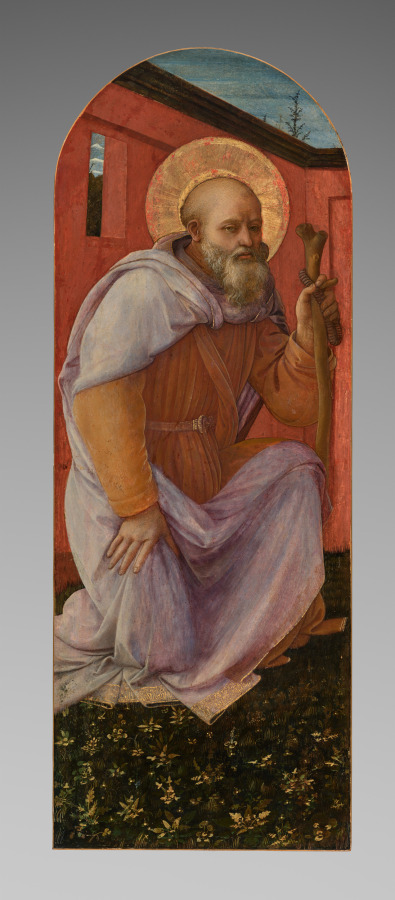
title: Panel from a Triptych: St. Anthony Abbot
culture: Italy, 15th century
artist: Fra Filippo Lippi (Italian, c. 1406–1469)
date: 1458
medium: tempera on wood panel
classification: Painting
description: These panels depicting Saints Anthony the Abbot and Michael originally flanked a central scene of the Madonna and Child with Angels, now lost, to form a triptych. Giovanni di Cosimo de’Medici of Florence commissioned the ensemble in 1457 as a gift to Alfonso V of Aragon. Fra Filippo Lippi, a Carmelite friar and one of the great masters of early Renaissance Florence, depicted realistic, weighty figures in a three-dimensional space using a system of linear perspective, inspired partly by Masaccio’s Brancacci Chapel, and reflected in the background architecture. Saint Anthony the Abbot rejected all earthly possessions in pursuit of a contemplative life in the desert. He is generally regarded as the founder of monasticism and is depicted wearing a monk’s habit. Saint Michael’s sword and shield refer to his role as heaven’s defender against evil.